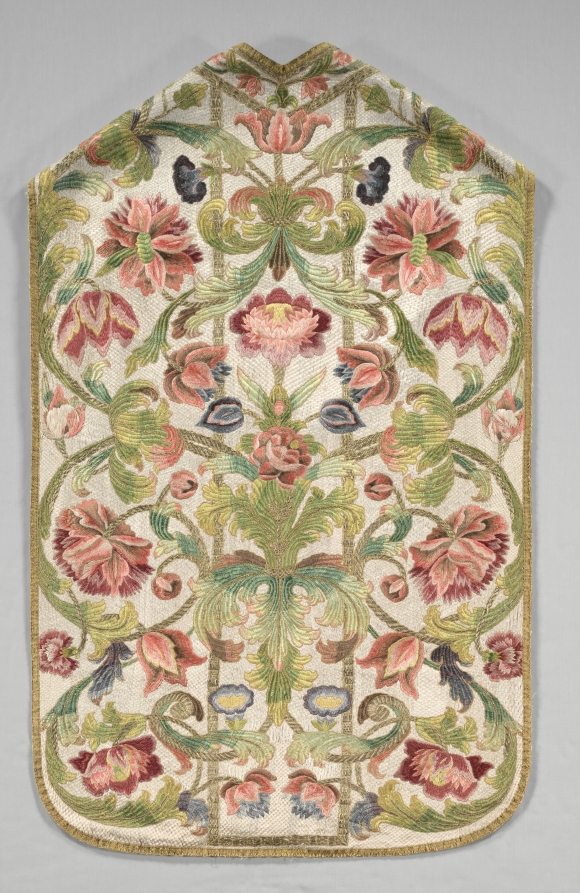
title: Chasuble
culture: Italy, 18th century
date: 1700s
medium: embroidery, silk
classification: Embroidery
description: The silk thread in this chasuble, a liturgical vestment worn over an alb, is exceptionally lustrous. The lavish allover floral and foliate decoration in pastel shades on golden stems and the ivory ground were embroidered with shiny floss silk—soft silk filaments that form loosely twisted instead of tightly twisted thread. The floss silk is crossed with parallel lines of thread in matching colors that are secured by a third thread from underneath, called laid and couched-work embroidery. The dazzling effect illustrates skilled workmanship.